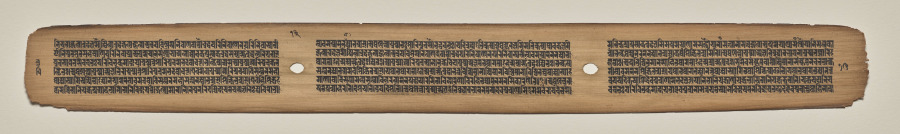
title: Text, Folio 13 (verso), from a Manuscript of the Perfection of Wisdom in Eight Thousand Lines (Ashtasahasrika Prajnaparamita-sutra)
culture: Eastern India, Bihar, Vikramashila Monastery. Painting: Nepal, Kathmandu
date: Sunday, September 14, 1119 (year 239 of the Newar Samvat in the month of Ashvina)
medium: gum tempera and ink on palm leaves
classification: Painting